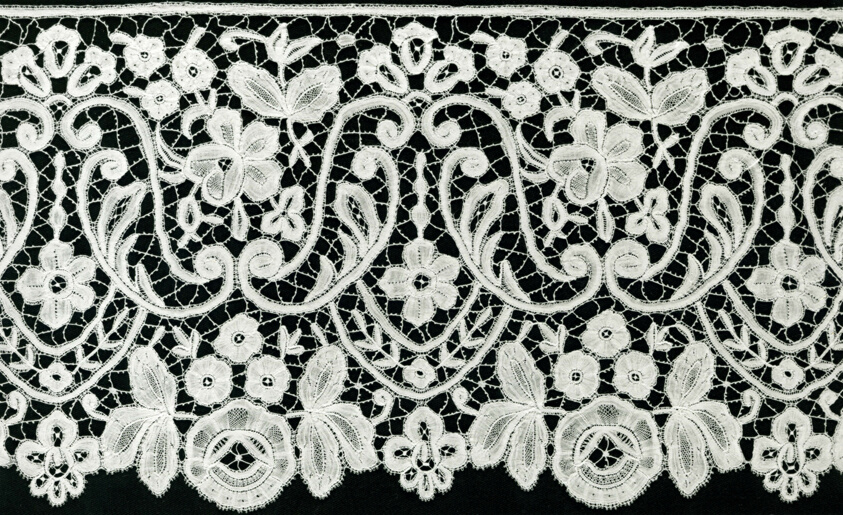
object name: Textile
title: Flounce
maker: Belgium, probably Bruges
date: 1865/85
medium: Cotton, bobbin part lace of a type known as "Duchesse de Bruges"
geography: Belgium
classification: textile; lace - bobbin